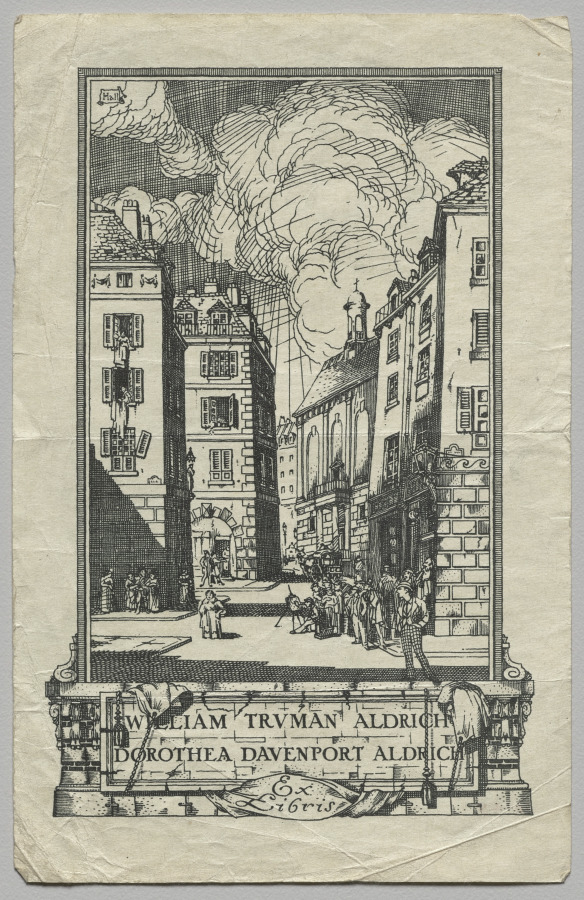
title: Bookplate: William Truman Aldrich and Dorthea Davenport Aldrich, Ex Libris inscribed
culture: America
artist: Frederick Garrison Hall (American, 1879–1946)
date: c. 1912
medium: engraving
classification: Print